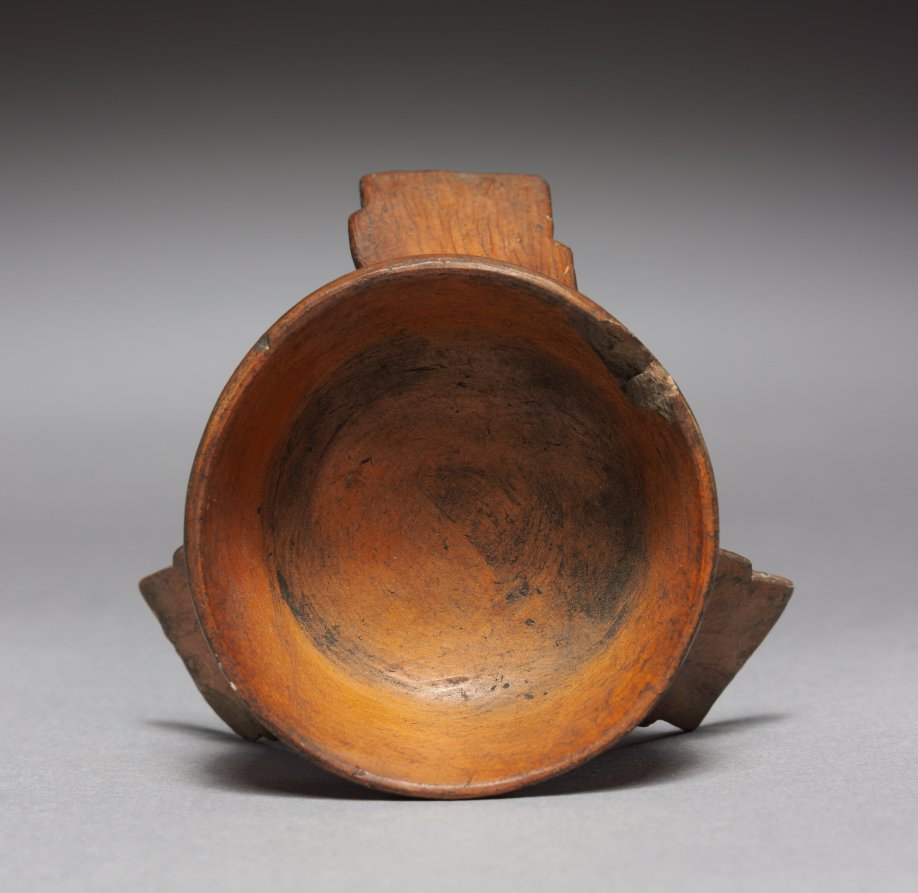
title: Tripod Dish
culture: Mexico, Aztec, 14th-16th century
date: 1325–1521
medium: terracotta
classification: Ceramic